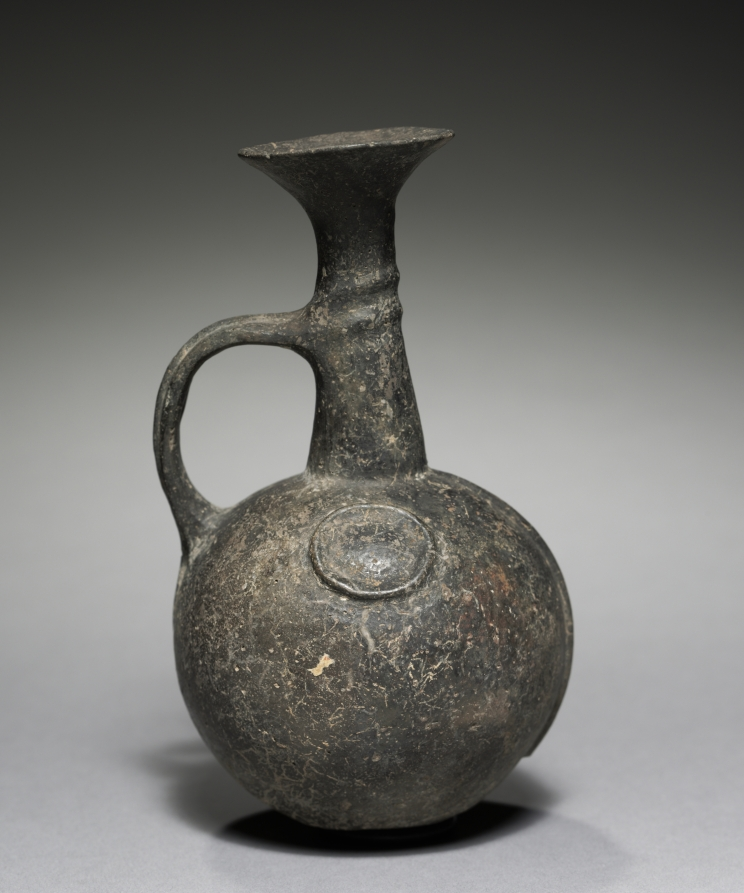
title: Jug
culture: Cyprus, late Cypriot I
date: c. 1600–1450 BCE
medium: base-ring ware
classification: Ceramic